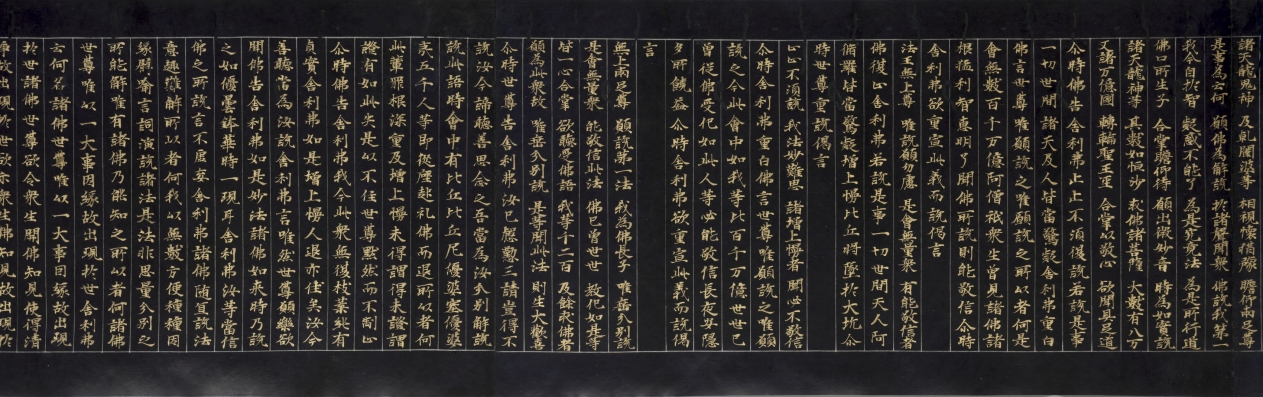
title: Lotus Sutra with a Frontispiece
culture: China, Song dynasty (960–1279)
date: late 1100s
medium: handscroll; gold ink on indigo sutra paper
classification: Painting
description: The frontispiece of this sutra, a sacred Buddhist scripture, illustrates episodes mentioned in the Buddha’s teaching. The sutra begins with a description of the historic Buddha Shakyamuni’s assembly on Vulture Peak. On the right, the Buddha sits amid members of his congregation: lohans (or arhats), bodhisattvas, gods, and other beings. The narrative proceeds from right to left. Heavenly light emanates from Shakyamuni’s brow to “illuminate the eighteen thousand worlds to the east.” Illustrated immediately below the ray is the sutra’s promise that if anyone carves or paints images of the Buddha “they will achieve the Buddha path.” The female figures in the frontispiece point to another promise made in this popular Mahayana school sutra, namely that female devotees and nuns who read the sutra are promised Buddhahood and salvation.